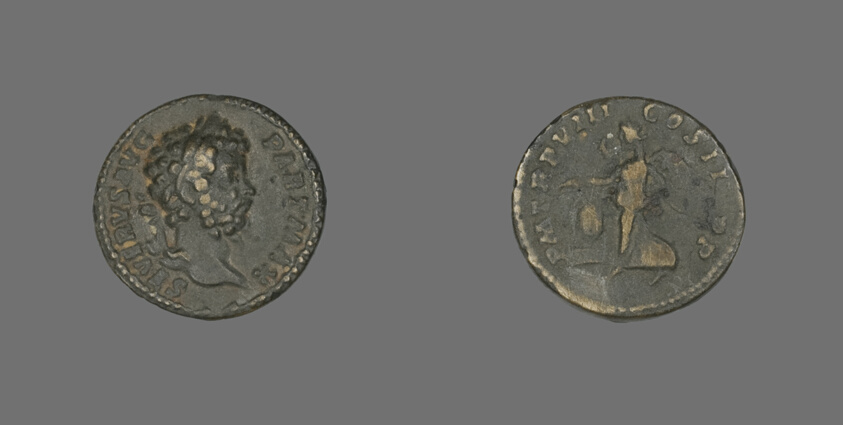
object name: Coin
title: Denarius (Coin) Portraying Emperor Septimius Severus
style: roman (ancient, style or period)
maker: Roman, minted in Rome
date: 200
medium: Silver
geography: Roman Empire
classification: coin; ancient art